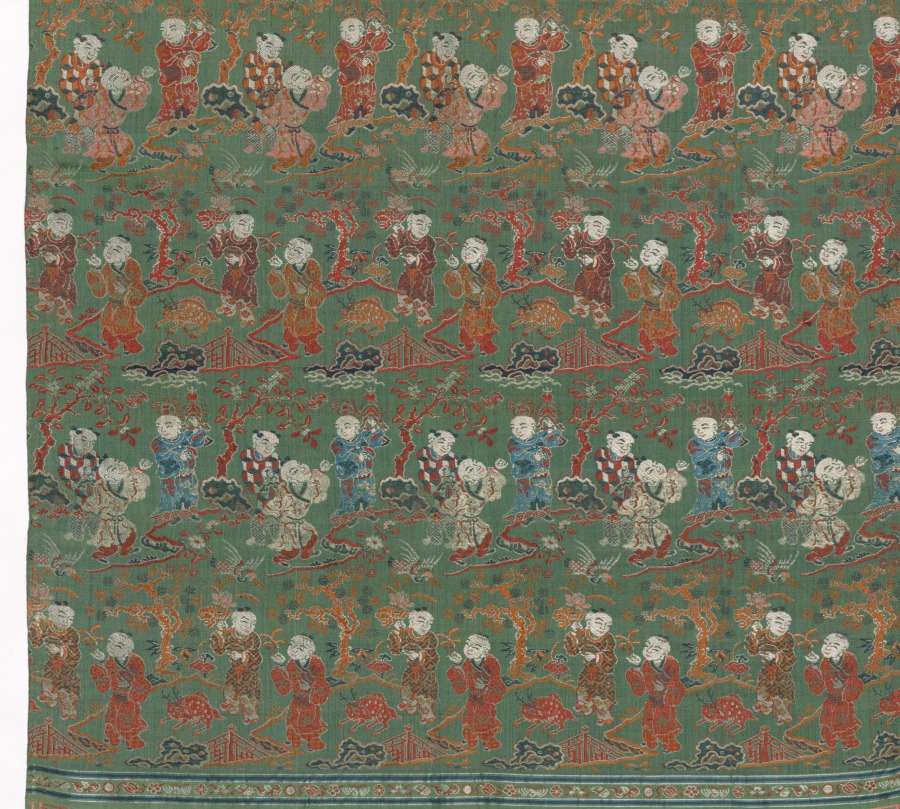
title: Compound Weave Textile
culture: China, Qing dynasty (1644-1911)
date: 1800s ?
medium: compound weave: silk and gold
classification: Textile